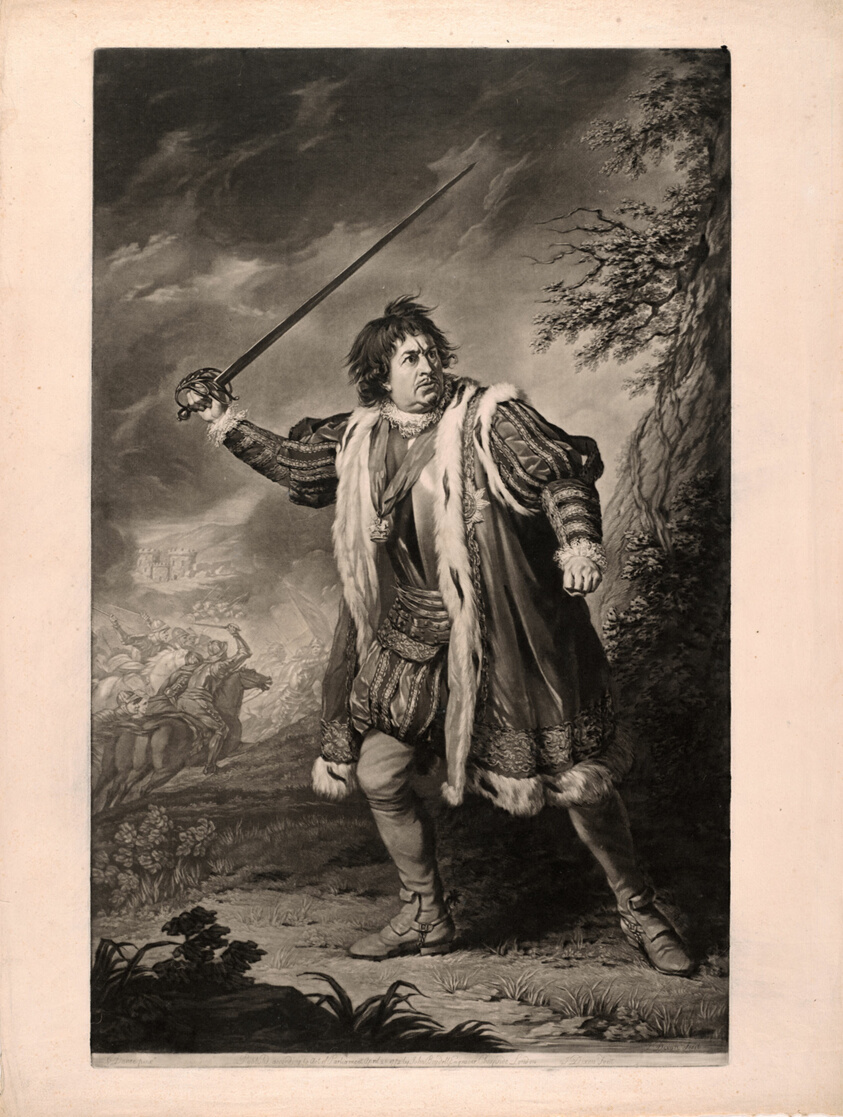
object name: Print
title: Mr. Garrick in "Richard the Third"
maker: John Dixon (English, born Ireland, c. 1730-1804); after Nathaniel Dance (English, 1735-1811); published by John Boydell (English, 1719-1804)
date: published April 28, 1772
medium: Mezzotint on cream laid paper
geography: England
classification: mezzotint; print; prints and drawing